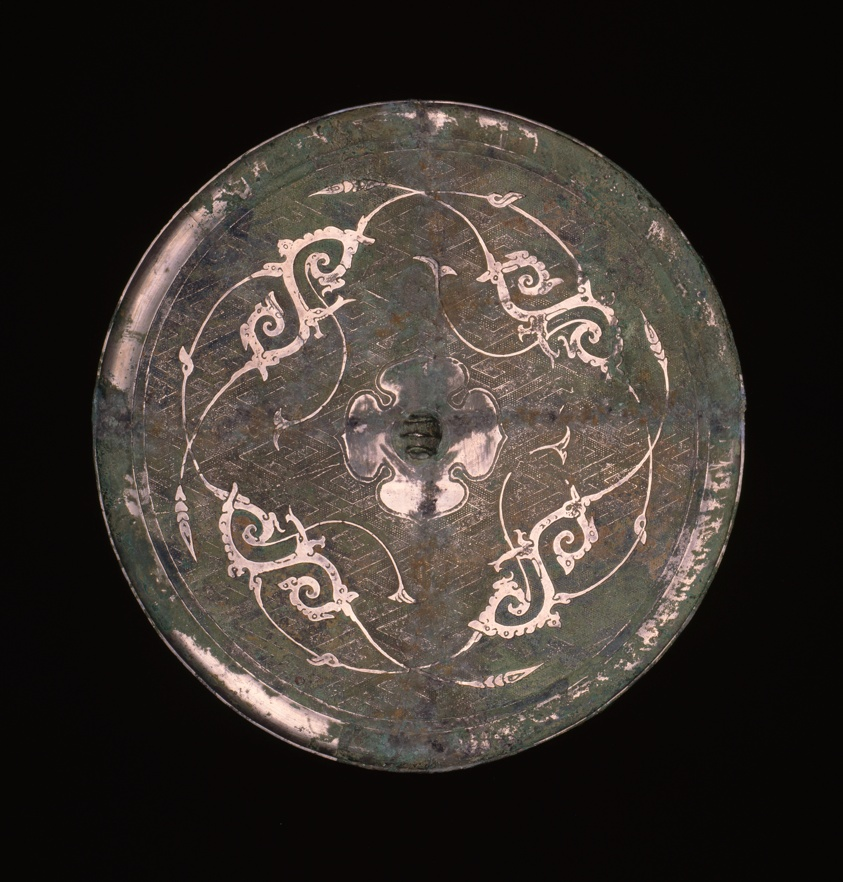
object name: Decorative Arts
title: Mirror with Dragon Arabesques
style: Chinese (culture or style)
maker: China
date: Eastern Zhou dynasty, Warring States period or early Western Han dynasty, 3rd/2nd century B.C.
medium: Bronze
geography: China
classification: bronze; metal; mirror; asian art; decorative arts